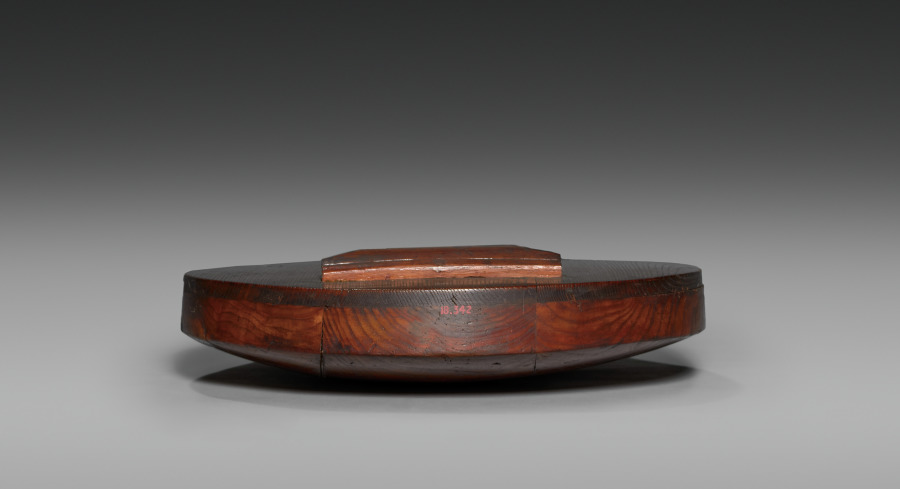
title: Heike Biwa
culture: Japan, Meiji period (1868–1912)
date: c. 1850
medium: Wood, bone, silk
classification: Musical Instrument